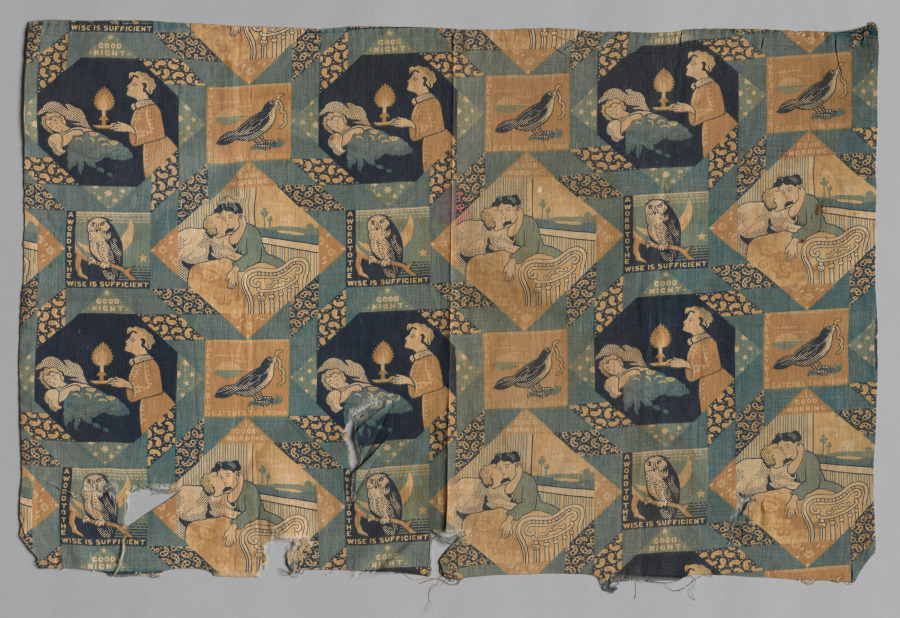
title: Roller Printed Cotton Textile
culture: America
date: 19th century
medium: plain cloth, roller printed: cotton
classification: Textile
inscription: titles accompany illustrations: "A Word to the Wise is Sufficient," "The Early Bird catches the Worm," "Good Night," and "Good Morning."